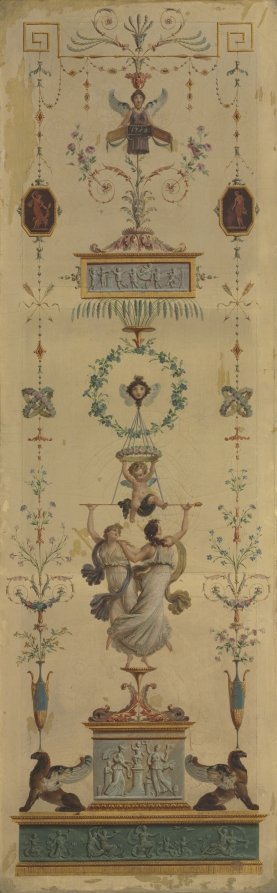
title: Decorative Panel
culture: France, 18th century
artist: Pierre Rousseau (French, 1751–1829)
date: 1790s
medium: oil on canvas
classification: Painting